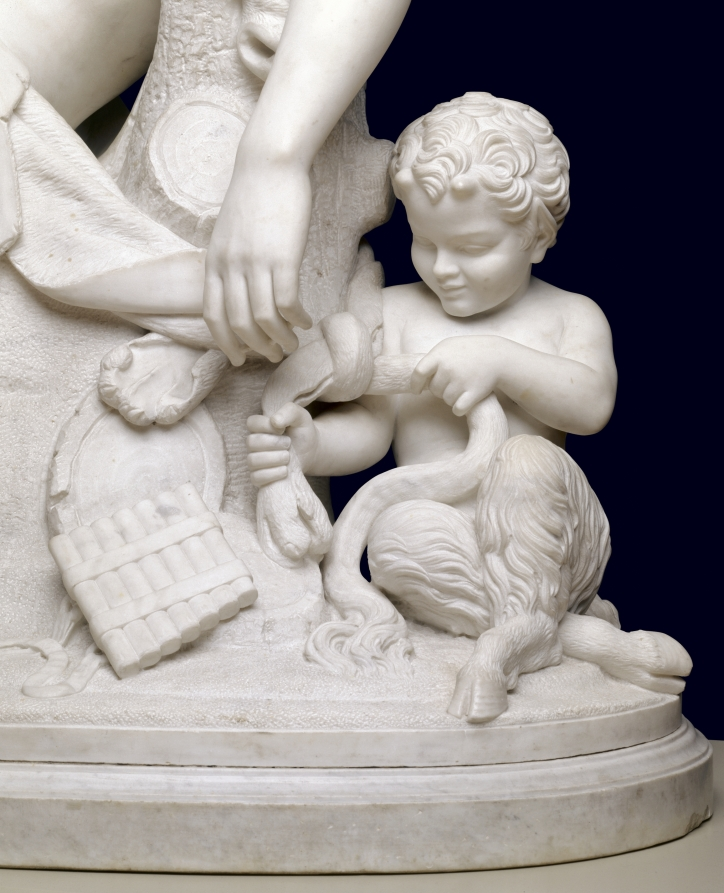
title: The Sleeping Faun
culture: America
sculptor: Harriet Goodhue Hosmer (American, 1830–1908)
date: modeled 1864, carved c. 1870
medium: marble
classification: Sculpture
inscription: Signed and inscribed on base: "H HOSMER Fecit -- Romae"; titled on base: "THE SLEEPING FAUN"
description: Hosmer is the best known female member of a large group of American artists working in Italy during the mid-1800s. The Sleeping Faun, a depiction of a pointed-eared woodland spirit, demonstrates her mastery of the neoclassical style, which was inspired by the art of ancient Greece and Rome. Hosmer’s playful sense of humor infuses the composition: a half-human, half-goat satyr mischievously ties the unwitting faun’s animal skin garment to a tree stump.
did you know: Hosmer said, "I honor every woman who has strength enough to step out of the beaten path. . . ."